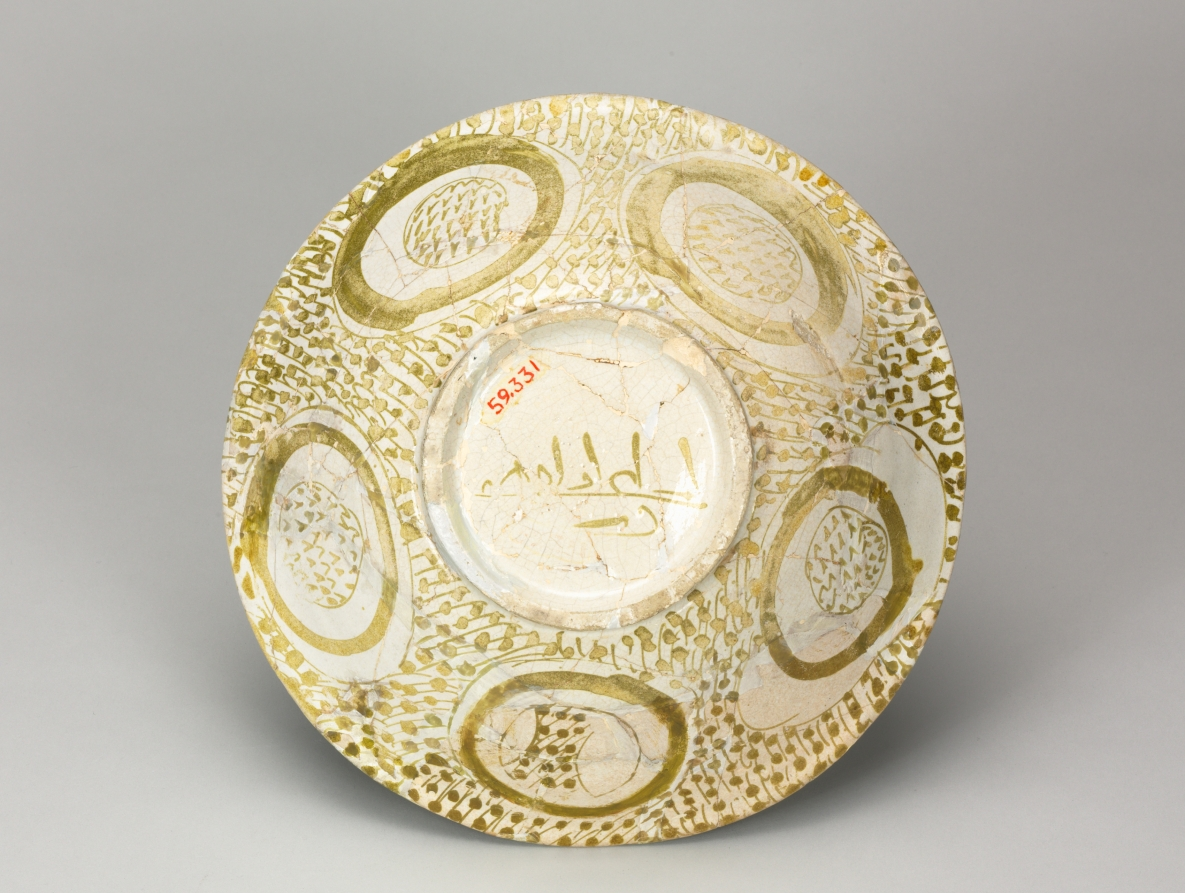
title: Luster Bowl with Man Holding a Banner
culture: Iraq, probably Baghdad, Abbasid Period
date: 900s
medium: earthenware with luster-painted design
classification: Ceramic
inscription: One undecipherable inscription on the foot ring on the outside.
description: This golden bowl displays a man holding a staff with a banner surmounted by a ball, crescent, and long streamer. He is flanked by two peacocks, one holding a palmette in his beak.